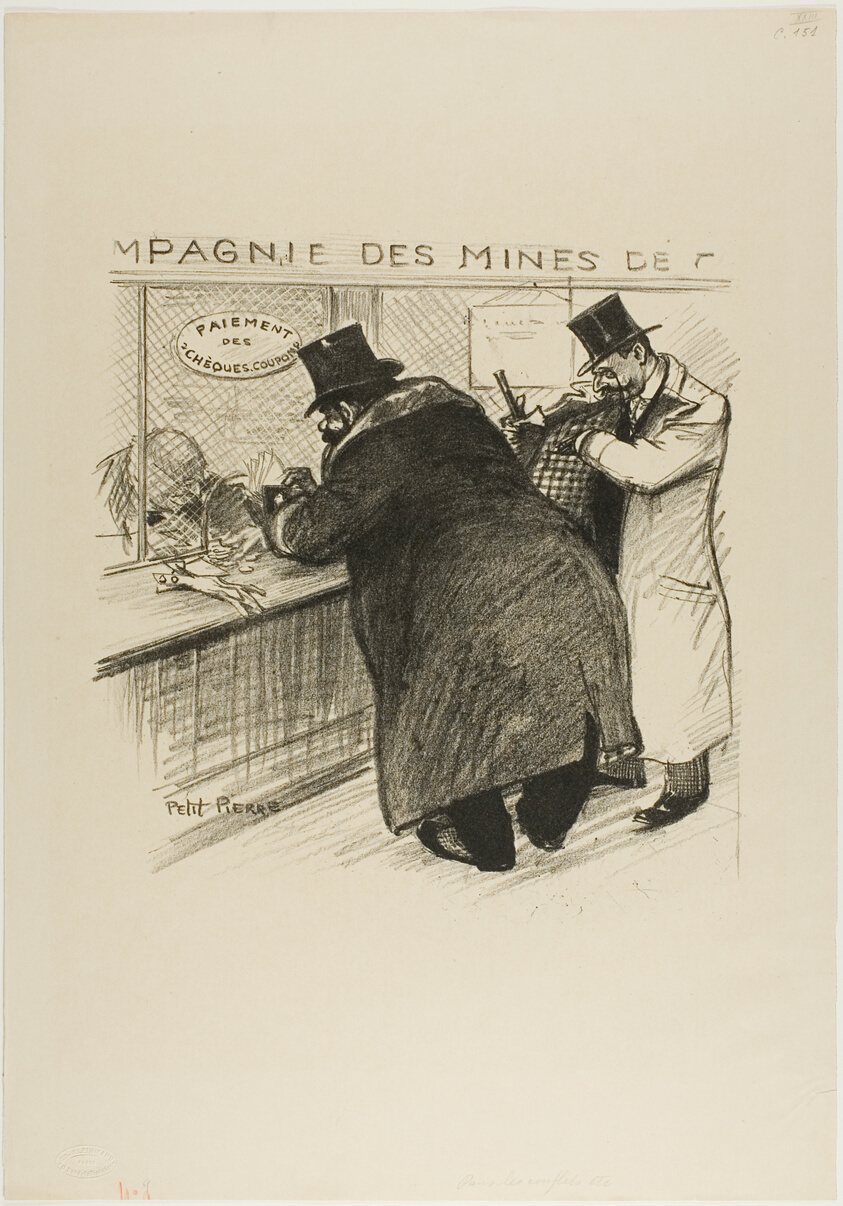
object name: Print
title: The Opportunist Majority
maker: Théophile-Alexandre Steinlen; French, born Switzerland, 1859-1923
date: May 1894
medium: Lithograph in black on cream wove paper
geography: France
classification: lithograph; print; prints and drawing